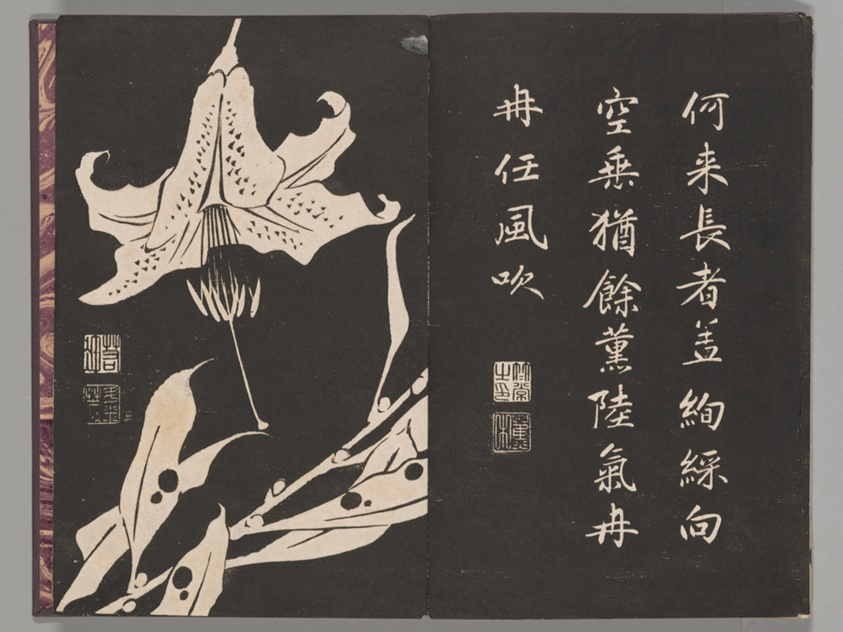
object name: Book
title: Soken sekisatsu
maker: Ito Jakuchu (Japanese, 1716-1800)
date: 1767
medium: Woodblock printed book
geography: Japan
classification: book